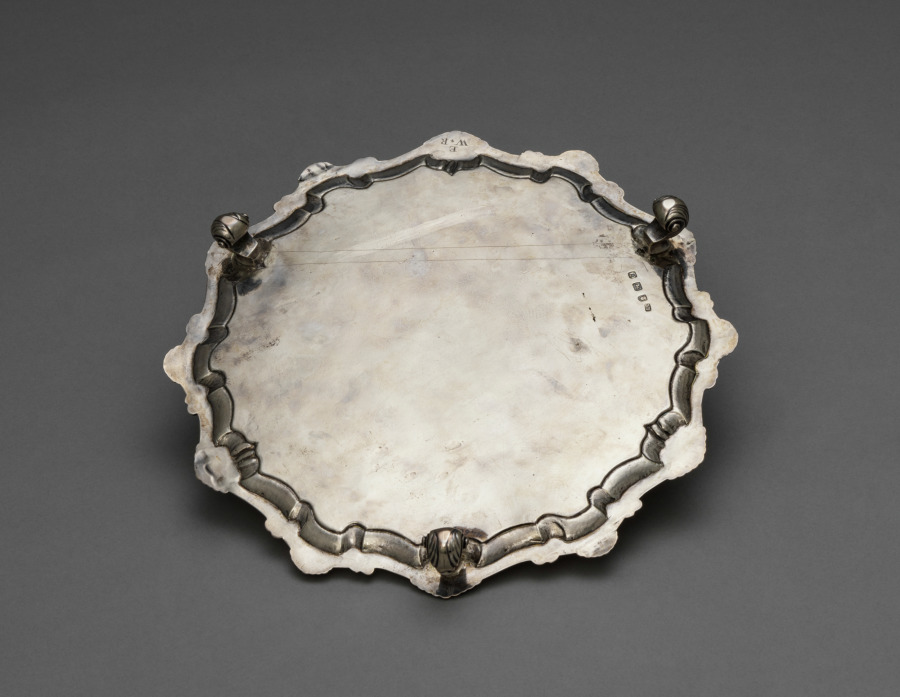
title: Salver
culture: England, 18th century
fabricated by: Ebenezer Coker (British)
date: 1769–1770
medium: silver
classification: Silver